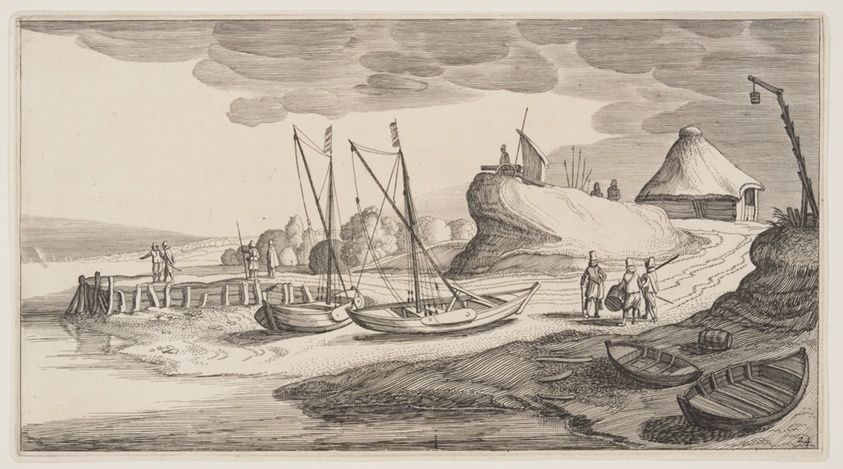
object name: Print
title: Boats Ashore Near a Watch-Tower, from Landscapes (Playsante Lantschappen)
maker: Attributed to Claes Jansz. Visscher II (Dutch, 1586-1652); after Jan van de Velde II (Dutch, c. 1593-1641)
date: c. 1641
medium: Etching, with engraving, on ivory laid paper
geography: Netherlands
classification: etching; paper; print; prints and drawing